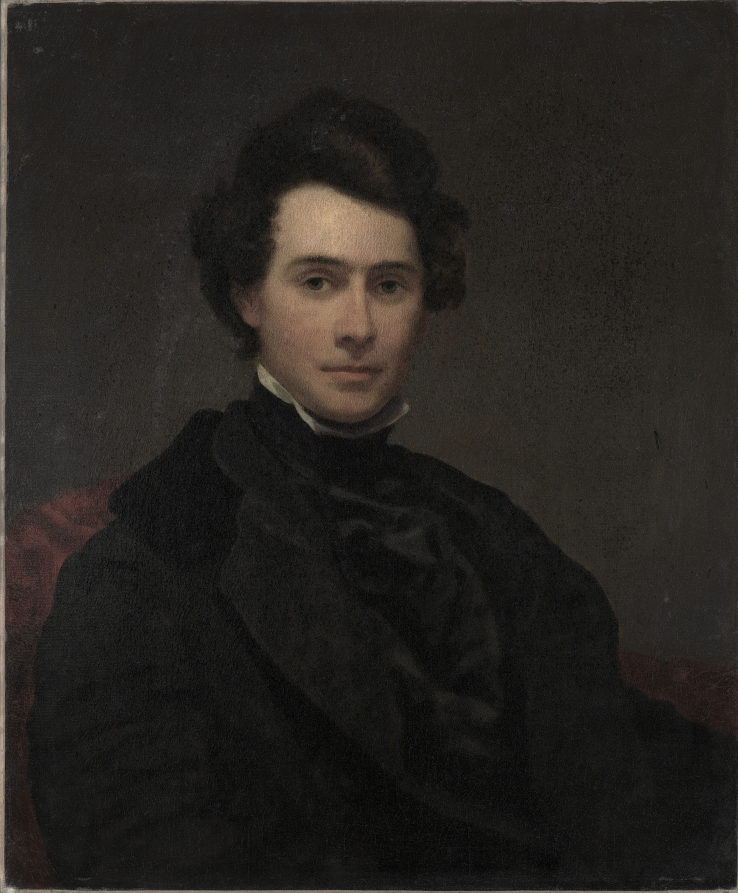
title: Tompkins Matteson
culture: America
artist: Charles Loring Elliott (American, 1812–1868)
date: c. 1840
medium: oil on canvas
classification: Painting